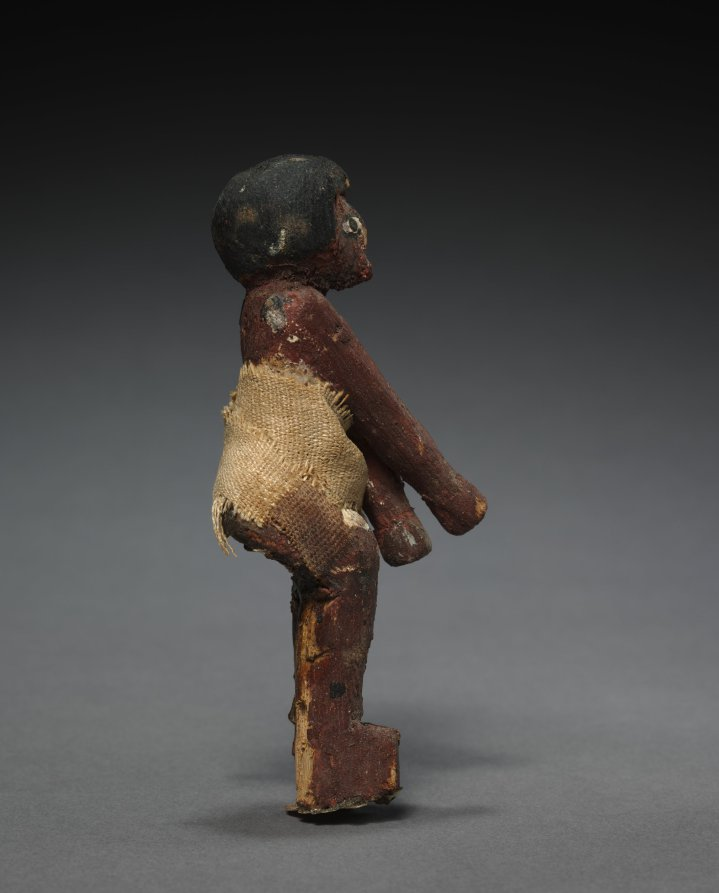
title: Seated Model Sailor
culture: Egypt, Middle Kingdom (2040–1648 BCE), Dynasties 11–12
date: c. 2000–1000 BCE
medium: painted sycamore fig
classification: Funerary Equipment